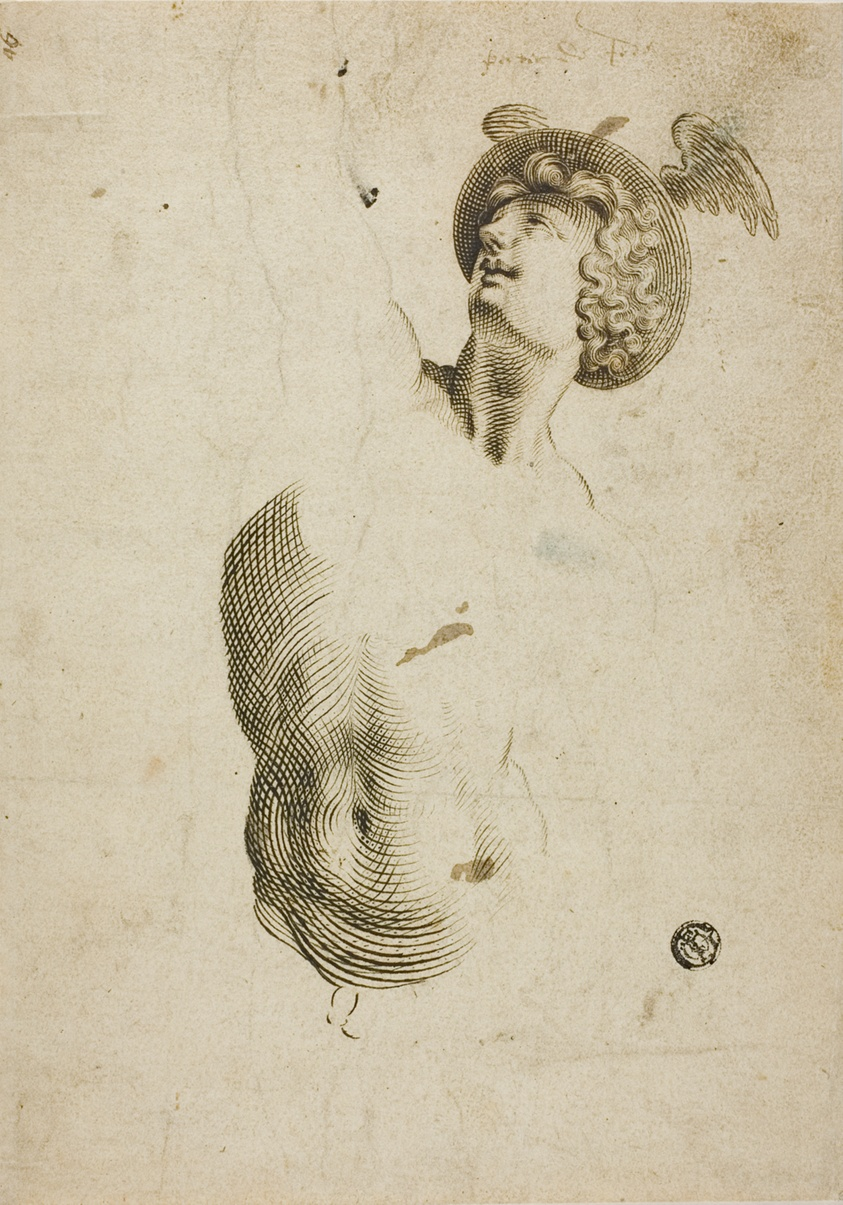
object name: Drawing and Watercolor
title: Mercury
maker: Attributed to Pieter de Jode I (Flemish, 1570-1634) or Jan Hamensz. Muller (Dutch, 1571-1628); after Giovanni da Bologna (Flemish, 1529-1608)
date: c. 1600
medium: Pen and brown ink with traces of black chalk on cream laid paper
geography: Holland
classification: pen and ink drawings; drawings (visual works); prints and drawing